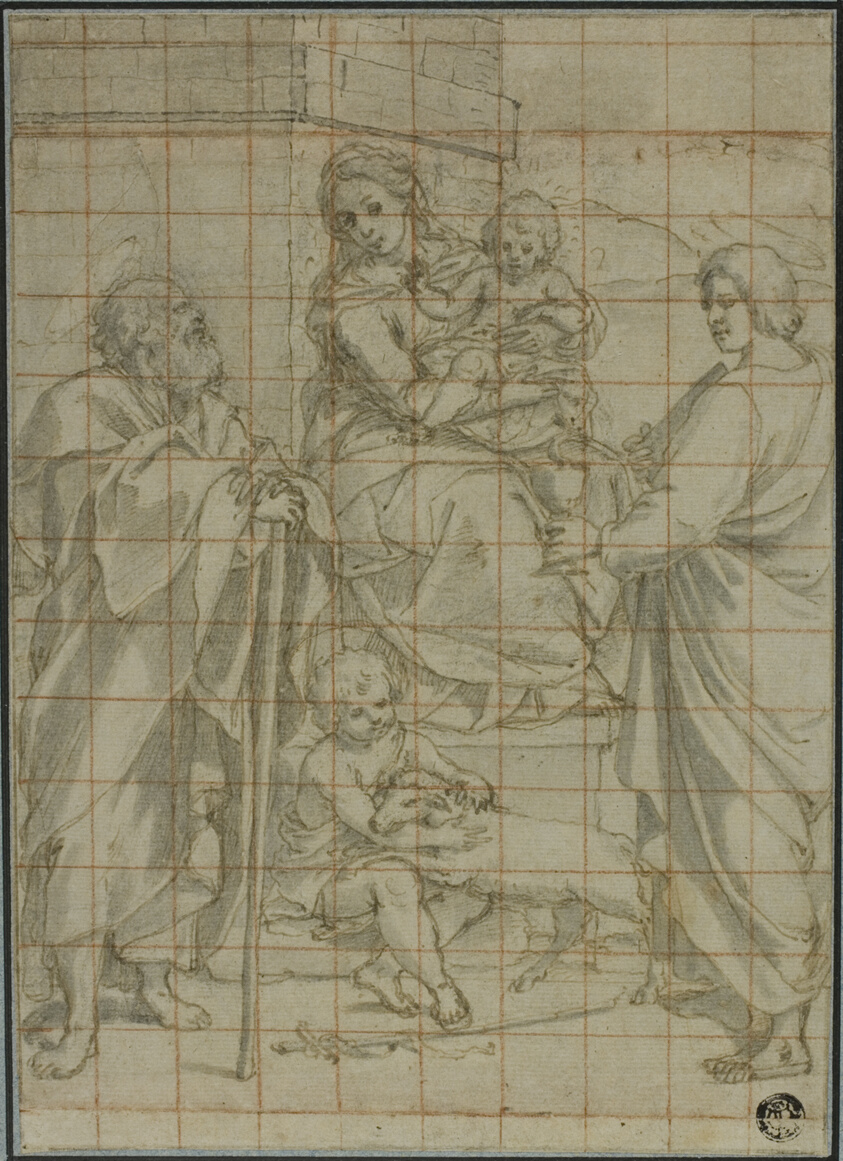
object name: Drawing and Watercolor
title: Holy Family with Saint John the Evangelist and the Infant John the Baptist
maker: Bartolomeo Cesi (Italian, 1556-1629)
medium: Pen and brown ink with brush and gray wash, over traces of black chalk, on tan laid paper, squared in red chalk, pieced and laid down on blue wove paper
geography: Italy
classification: ink with wash; drawings (visual works); prints and drawing